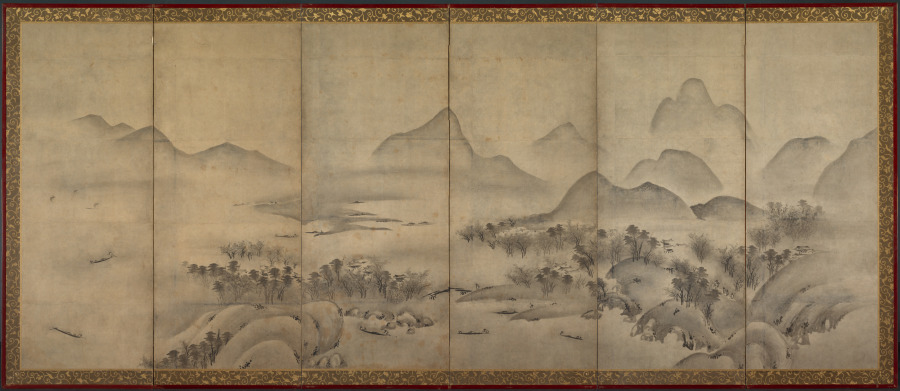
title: Moonlit Landscape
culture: Japan, Muromachi period (1392–1573)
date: late 1500s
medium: pair of six-panel folding screens, ink on paper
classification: Painting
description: This unsigned and unsealed composition includes imagery from the Eight Views of the Xiao and Xiang Rivers. Scanning the composition from right to left, four of the Eight Views subjects appear: sunset glow over a fishing village, returning sails off a distant shore, autumn moon over Lake Donting, and evening bell from a mist-shrouded temple. Not all the elements of the traditional Eight Views theme are here, but the artist suggests its literary presence by leading the viewer through a summer’s journey from one day to the next, aided, like the travelers in the landscape, by the light of the moon.